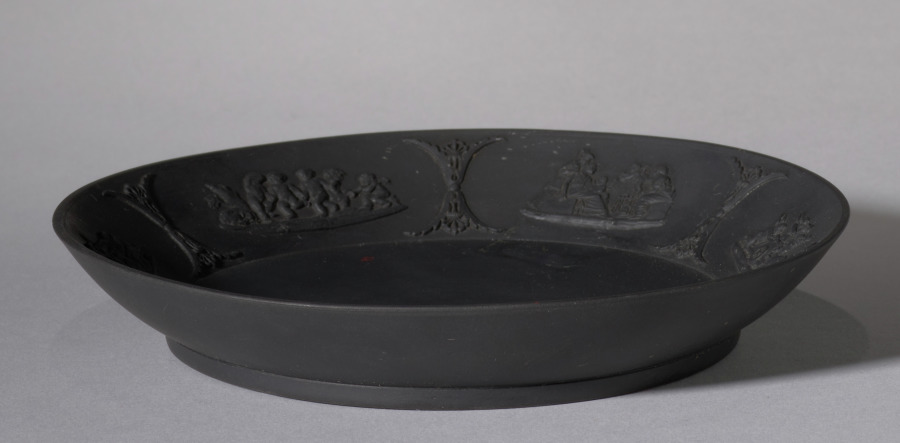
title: Saucer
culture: England, Staffordshire, 19th century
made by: Wedgwood Factory (British)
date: 1800s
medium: black basalt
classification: Ceramic